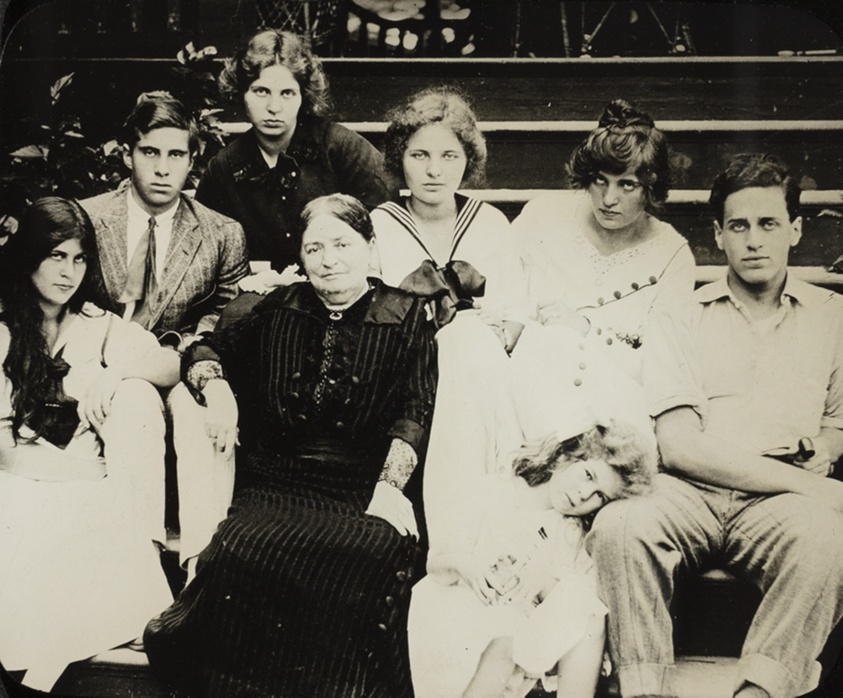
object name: Photograph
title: Untitled (Stieglitz's mother Hedwig with grandchildren on Oaklawn steps)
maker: Alfred Stieglitz (American, 1864–1946)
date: c. 1916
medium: Lantern slide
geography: United States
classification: lantern slide (glass); negative/transparency; photography; photograph